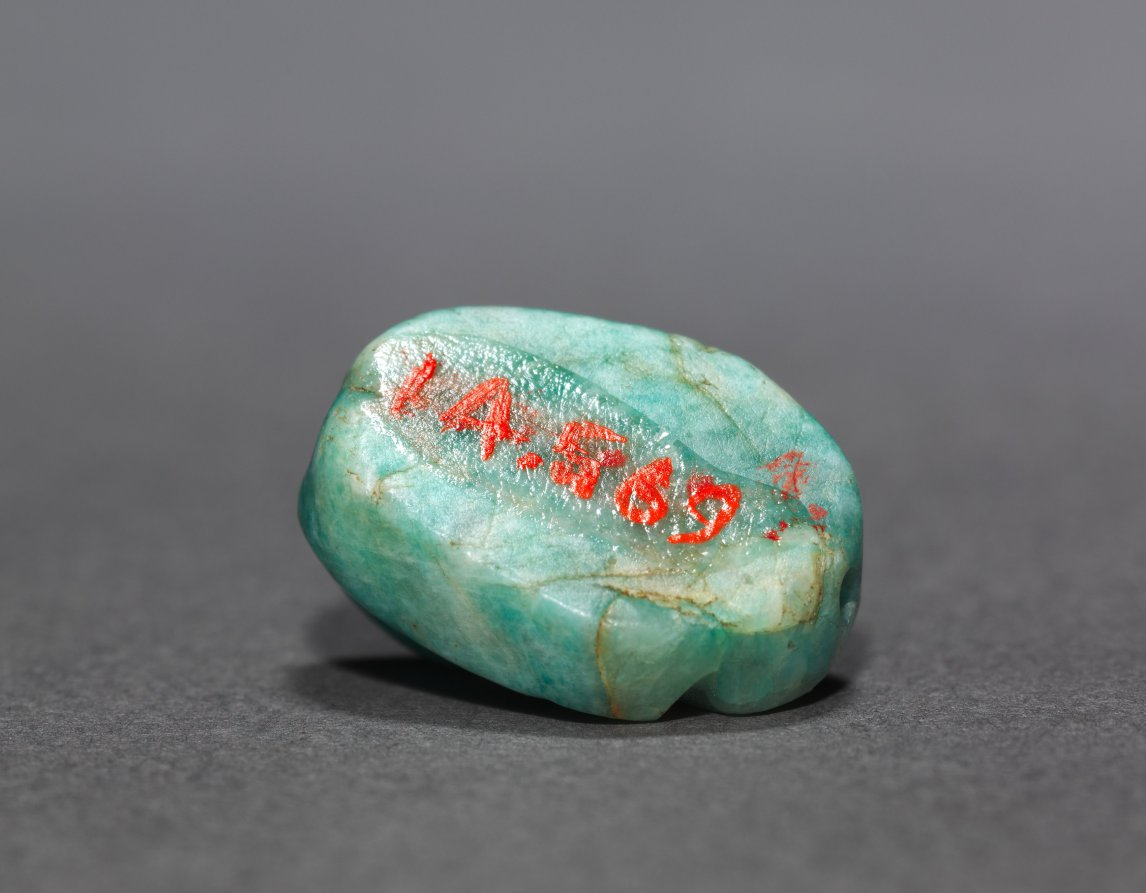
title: Sleeping Duck Amulet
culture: Egypt, New Kingdom (1540–1069 BCE), Dynasty 18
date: 1540–1295 BCE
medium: feldspar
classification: Amulets